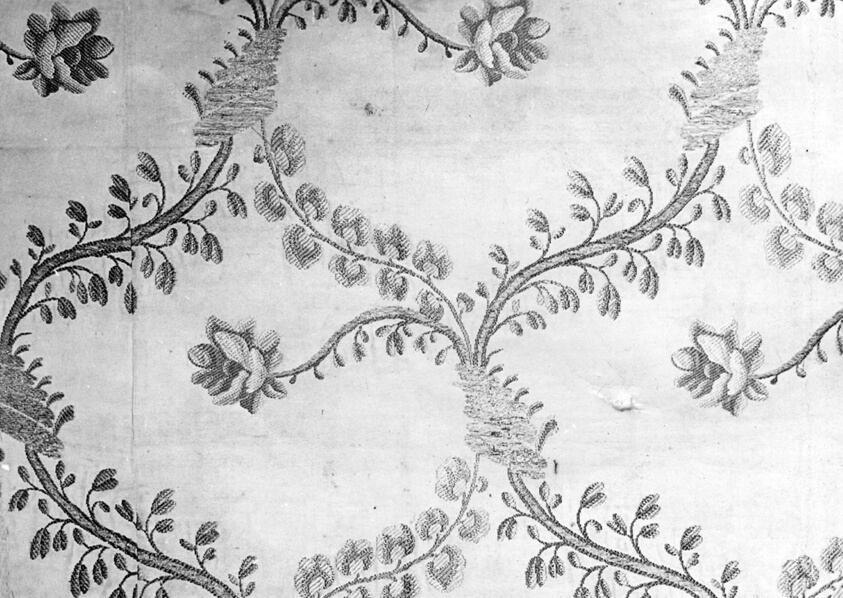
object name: Textile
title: Panel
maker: England, Spitalfields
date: c. 1742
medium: Silk, gold-gilt strip, and gold-gilt-strip-wound-around-a-silk-fiber core, warp-float faced 7:1 satin weave with supplementary brocading wefts bound in 3:1 twill interlacing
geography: Spitalfields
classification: textile; weaving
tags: vines, flowers